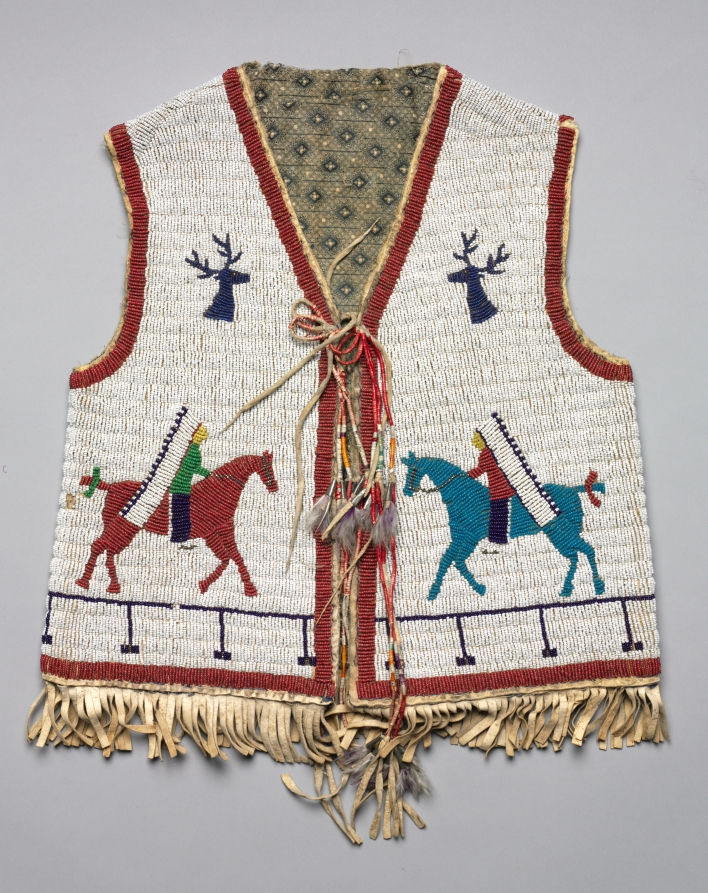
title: Beaded Child's Vest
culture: America, Native North American, Plains, Lakota(Sioux), Post-Contact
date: c 1890–1900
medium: beaded leather; cotton lining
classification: Garment